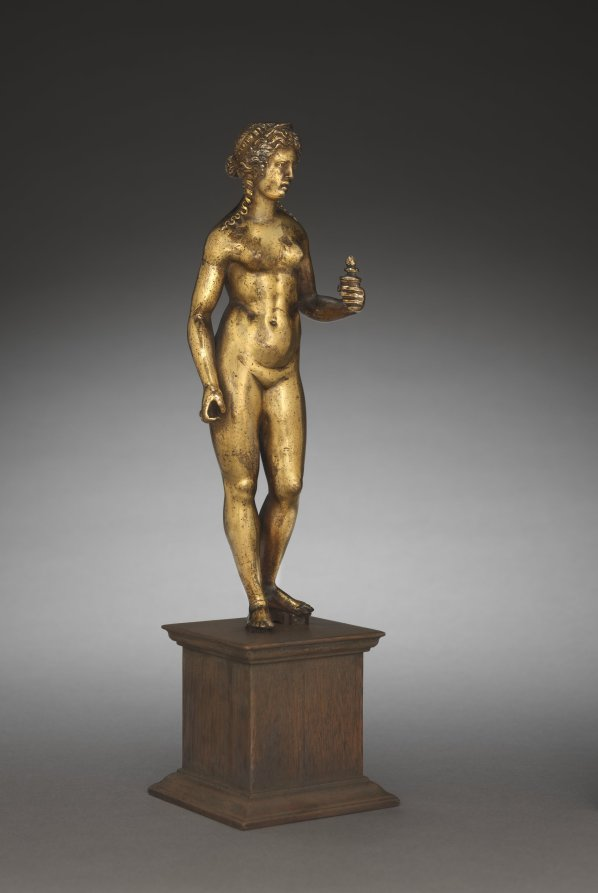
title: Venus with a Burning Urn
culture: Northern Italy, 16th century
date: c. 1500–1520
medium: gilt bronze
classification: Sculpture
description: Venus is the Roman goddess of many virtues, including Love, Charity, Fertility, and Victory. Here, Venus is represented as the goddess of Charity. She wears a crown, as Charity is often depicted as the Queen of the Virtues. The flaming lamp in Venus's left hand was also a symbol of Charity in Venice, where this piece is thought to have originated. The bent fingers of her right hand are bent suggest that Venus may have once held another object. Renaissance sculptors often looked back to antiquity when producing monumental and small bronze statues. The small bronze cabinet piece comes into Italian art during this time, bringing ancient gods and goddesses into Italian households. Venus stands in a contrapposto pose and, like Hellenistic and Roman objects, her locks are tied by a double ribbon while two curls fall on her shoulders. Her tilted head and large emotional eyes, as well as her small nose and parted lips reflect the influence of Hellenistic Greek facial styles.